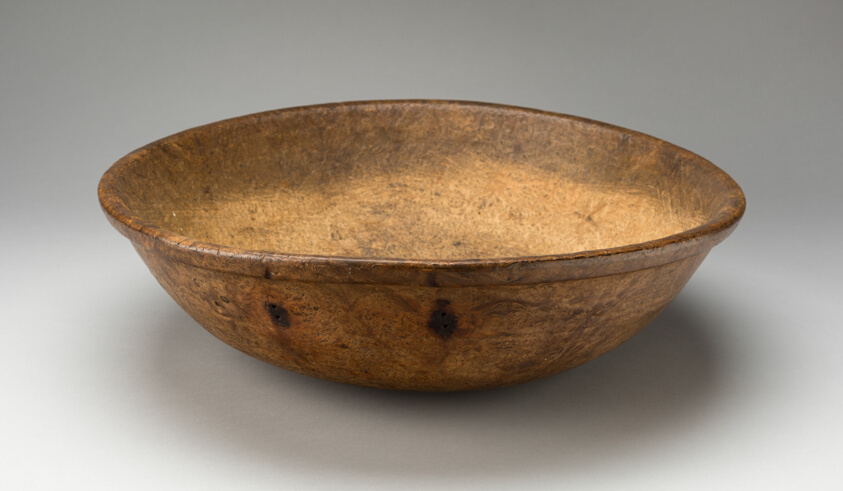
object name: Decorative Arts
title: Bowl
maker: Artist unknown (American, 19th century)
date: 1810–40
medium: Wood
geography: United States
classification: bowl; wood; american decorative arts; american arts; decorative arts